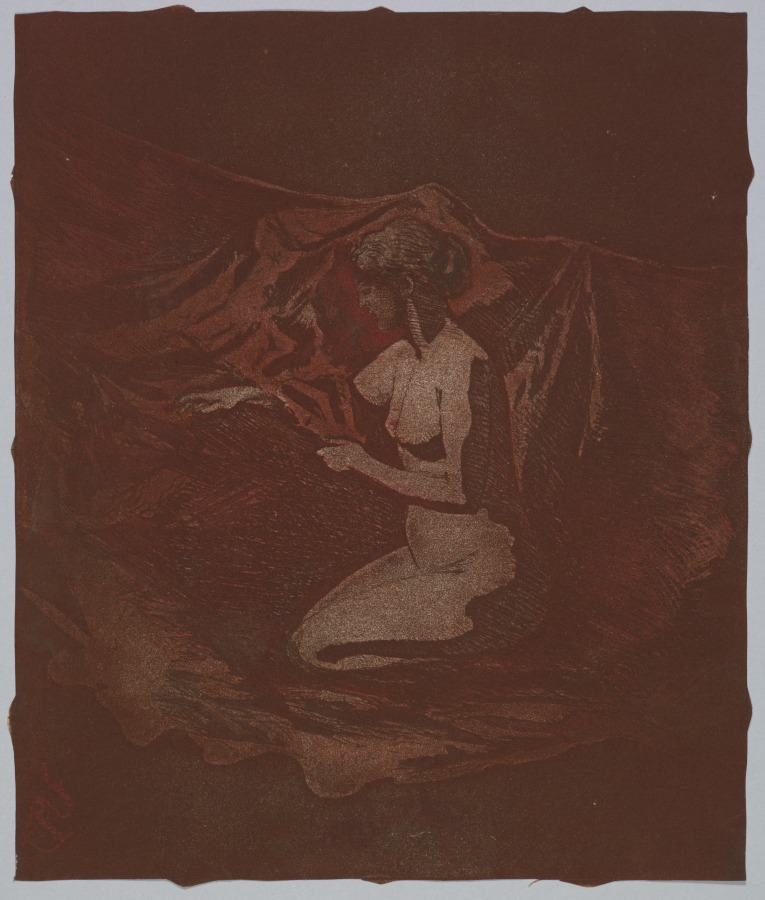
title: Embers Glow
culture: France, 19th century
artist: Theodore Roussel (French, 1847–1926)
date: 1890–1897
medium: color etching and aquatint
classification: Print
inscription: verso, center, in graphite: 1